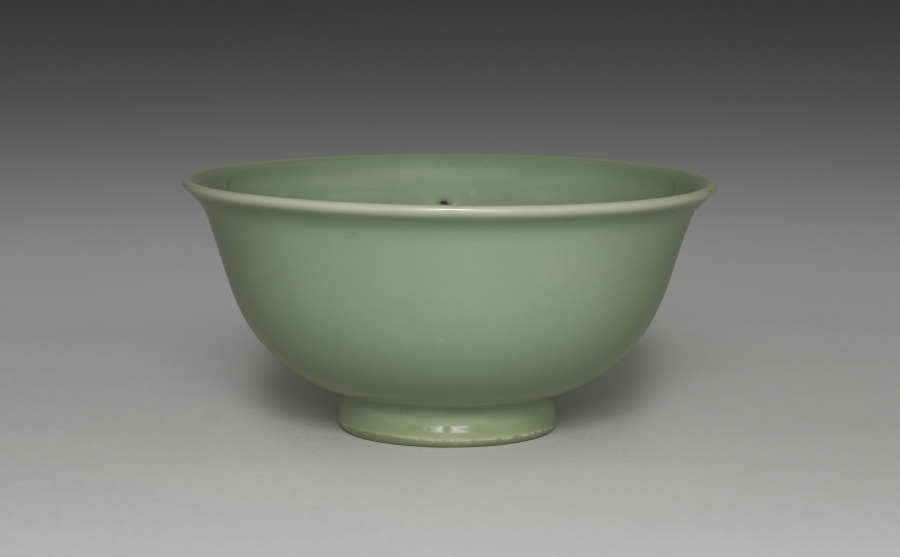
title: Dining Bowl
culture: Japan, Meiji period (1868–1912)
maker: Seifū Yohei III (Japanese, 1851–1914)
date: 1912–14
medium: Porcelain with green glaze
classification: Ceramic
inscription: 共箱の箱書：（蓋表）秘色彩古磁盂（印：清風）；（蓋裏）清風制之（印：帝室技藝員）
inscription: 彫銘：清風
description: This Yohei III dining bowl with an everted rim has a glaze identified in its box lid inscription as hisoku (C. mise), or “mysterious color.” This name typically refers specifically to a type of high-quality, green-glazed ceramic produced in the ninth and tenth centuries at the Yue kilns in China’s Zhejiang Province as tribute ware for the imperial family.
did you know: Many ceramics created by the Seifū Studio refer to and emulate Chinese ceramics in form and glazing.